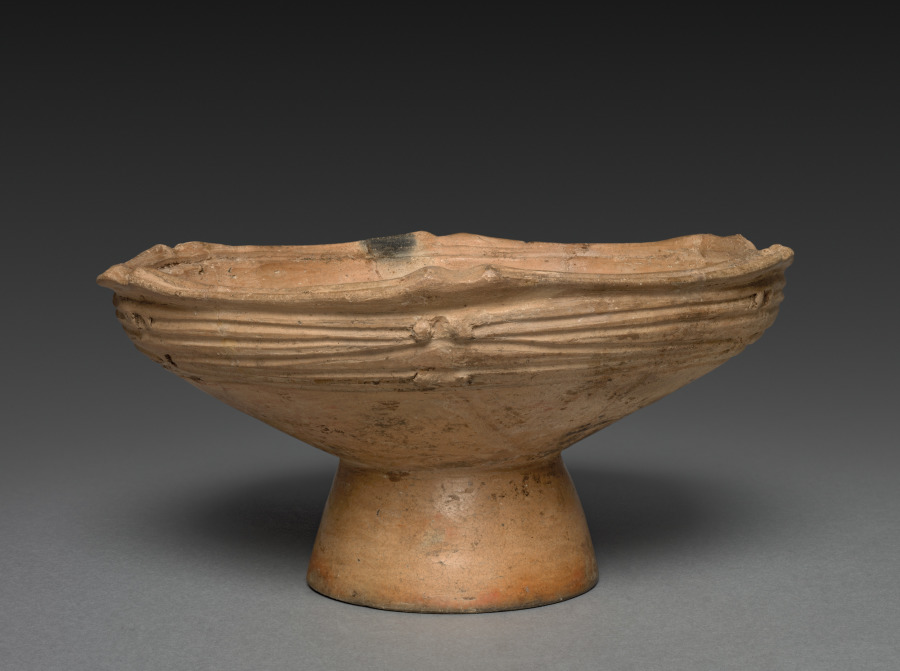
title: Pedestalled Dish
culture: Japan, Jōmon period (c. 10,500–300 BCE)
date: c. 1000–500 BCE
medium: burnished earthenware with carved and impressed decoration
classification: Ceramic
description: The Jomon period (10,500-300 BC) marks the beginning of the Japanese ceramic tradition, one of the most vibrant in world history. Major features such as an emphasis on asymmetrical silhouettes, great attention to surface texture, technological simplicity, and ambivalence to bright color already appear in this era. Late Jomon vessels are typically formed of a dense clay paste, and during this period, smaller serving vessels appear, in contrast to earlier deep storage or cooking vessel shapes. New types of surface decoration-carved rather than impressed into the clay body-herald the arrival of a distinctive aesthetic. The attachment of the pedestal to this shallow bowl, as well as the vessel's rather thin walls, also identify a new stage in ceramic production in Japan.